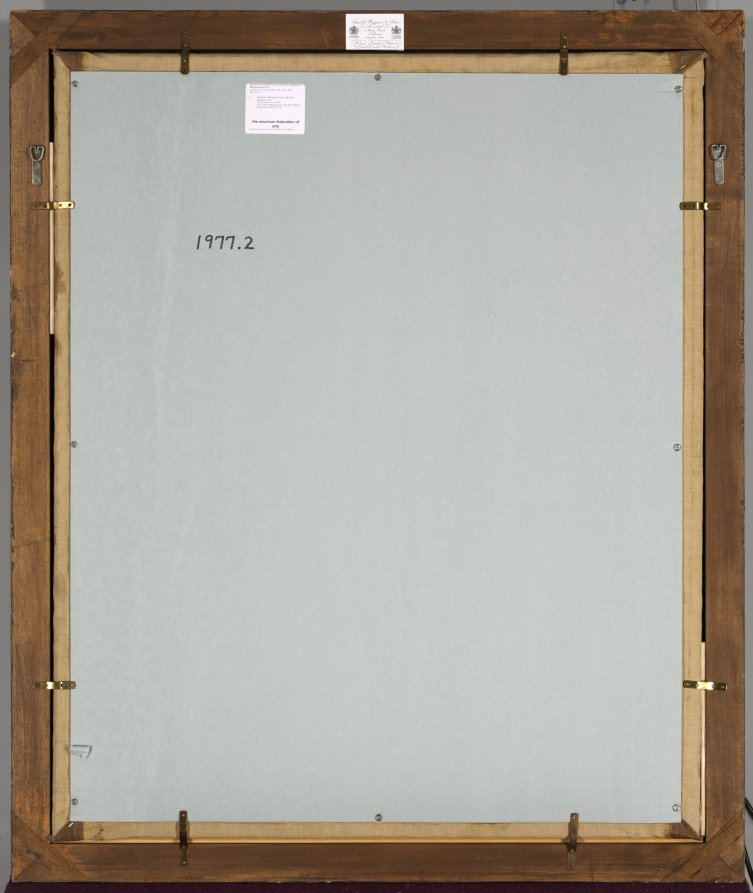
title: Saint Jerome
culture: Flanders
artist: Hendrick ter Brugghen (Dutch, 1588–1629)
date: c. 1621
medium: oil on canvas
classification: Painting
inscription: Signed and dated upside down on open book: "H TBrugghen 1621"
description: Not all subjects are easy to identify. This museum long thought that the subject was the Greek philosopher Heraclitus, largely because tears are part of the standard representation of this ancient thinker. However, ter Brugghen omits the other crucial key to identifying Heraclitus--a globe over which he weeps. Instead, the book and skull indicate that the figure is Saint Jerome, known for translating the Bible into Latin. The artist probably chose to show Jerome crying to intensify his penitence.